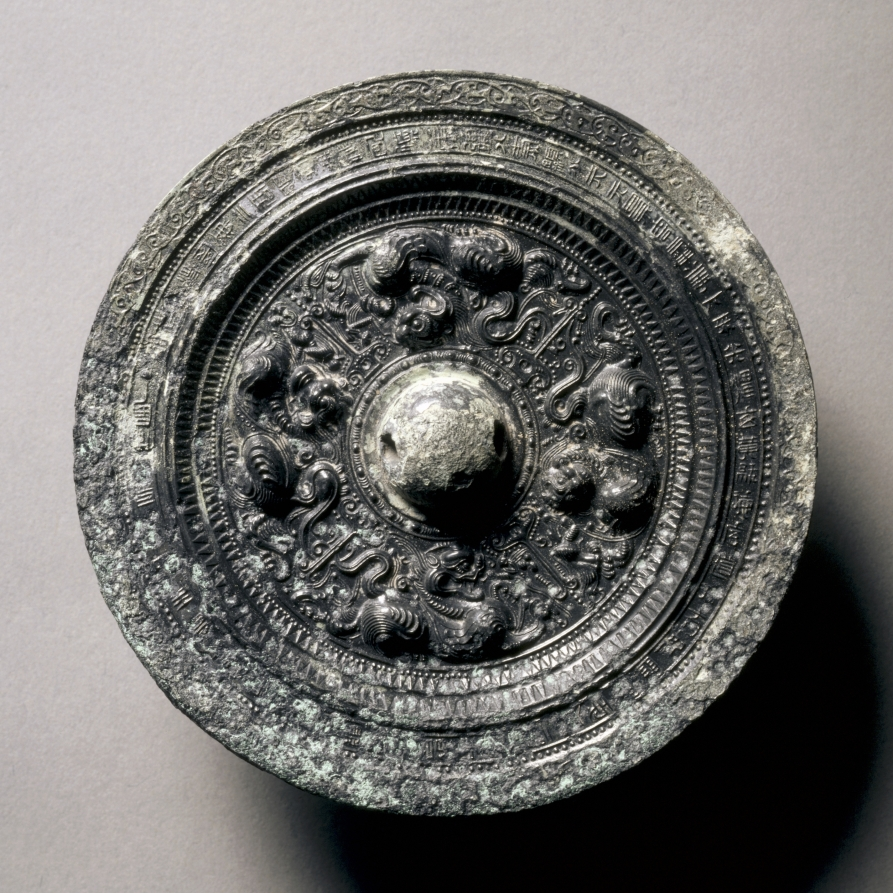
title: Mirror with Four Bixie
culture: China, Southern and Northern Dynasties period (386-589)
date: early 400s–late 500s CE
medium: bronze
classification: Metalwork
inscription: 吾作明鏡，幽涑三商。 雕刻典祚，配德萬疆。 人氣顯分，天元景容。座事六采， 光耀玄黃。統德序道，【】有紀綱 ...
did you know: A bixie is a fantastical hybrid creature that was believed to ward off evil spirits